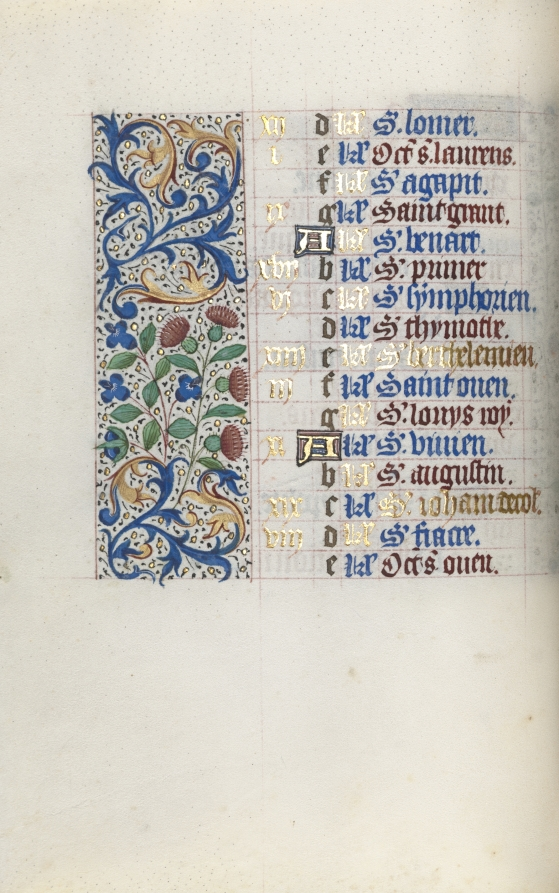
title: Book of Hours (Use of Rouen): fol. 8v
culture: France, Rouen, 15th century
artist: Master of the Geneva Latini (French, active Rouen, 1460–80)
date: c. 1470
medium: ink, tempera, and gold on vellum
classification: Bound Volume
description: In the late 1400s and early 1500s Rouen was an established and important center of book production. The city’s cathedral had a wealthy chapter that spent large sums of money to commission books and to maintain its extensive library. The stationers and booksellers would have likely been concentrated in or near the cathedral precinct. This artist, named after a manuscript now in Geneva, was Rouen’s principal illuminator during the second half of the 1400s.